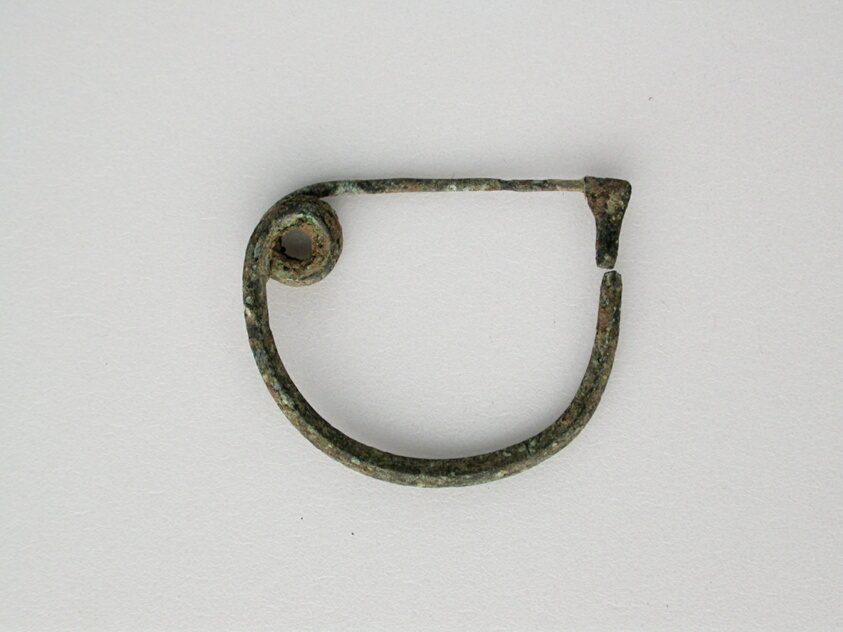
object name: Costume and Accessories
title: Bow Fibula (wire)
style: geometric, ancient, greek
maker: Greek; Thessaly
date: Geometric Period (800–600 BCE)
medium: Bronze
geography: Greece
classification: votive offering; jewelry; ex-voto; fibula; costume